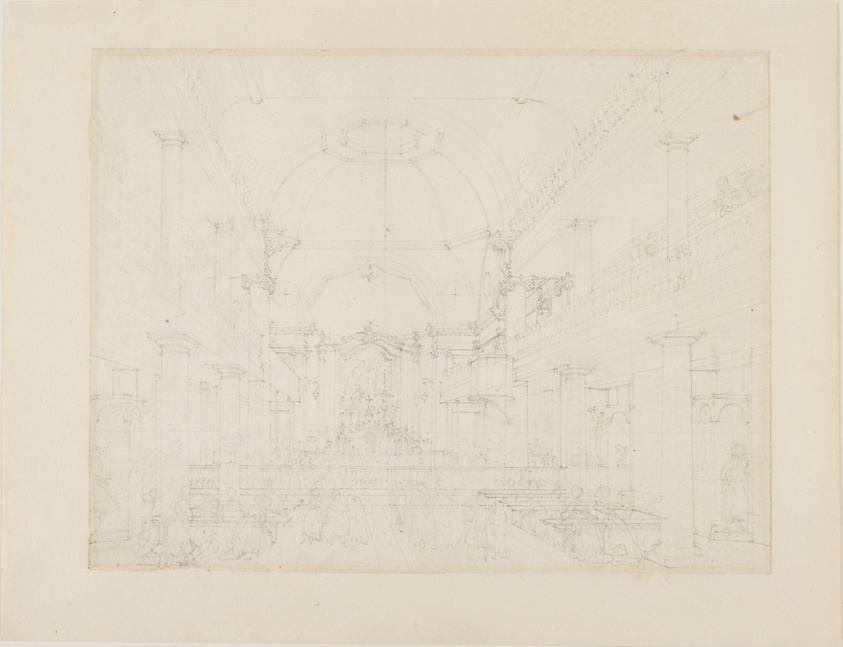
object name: Drawing and Watercolor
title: Study for The Roman Catholic Chapel, Lincoln's Inn Fields, from Microcosm of London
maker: Augustus Charles Pugin (English, born France, 1762-1832); Thomas Rowlandson (English, 1756-1827)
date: c. 1808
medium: Graphite on ivory wove paper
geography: England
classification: graphite; drawings (visual works); prints and drawing